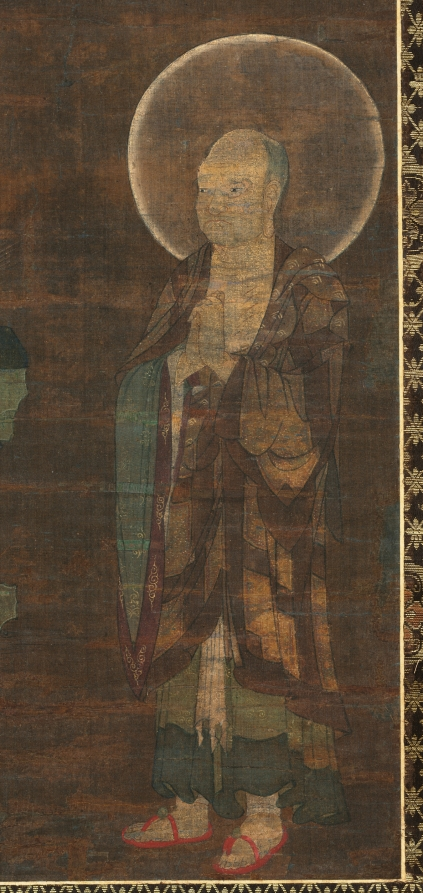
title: Shakyamuni Triad: Buddha Attended by Manjushri and Samantabhadra (Buddha)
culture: China, Fuzhou, Fujian Province, Yuan dynasty (1271-1368)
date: late 1300s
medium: Hanging scroll; ink and color on silk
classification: Painting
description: This triptych is a rare example of Yuan Buddhist painting. It depicts the historic Buddha Shakyamuni flanked by two attending bodhisattvas, Manjushri (the bodhisattva of wisdom, riding a lion) and Samantabhadra (the bodhisattva of universal virtue, riding an elephant). Below them are others seeking enlightenment: two disciples of the Buddha (Ananada and Kasyapa), two non-Chinese people, a boy with topknots, and a female worshiper. The clouds above and around the divine beings form one scene that illustrates Shakyamuni’s sermon from the Lotus Sutra. This text became an important basis for Buddhist faith throughout East Asia and was central to the Mahayana school of Buddhism.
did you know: Shakyamuni is seated cross-legged on the throne with the hand gesture (mudra) of giving instruction.